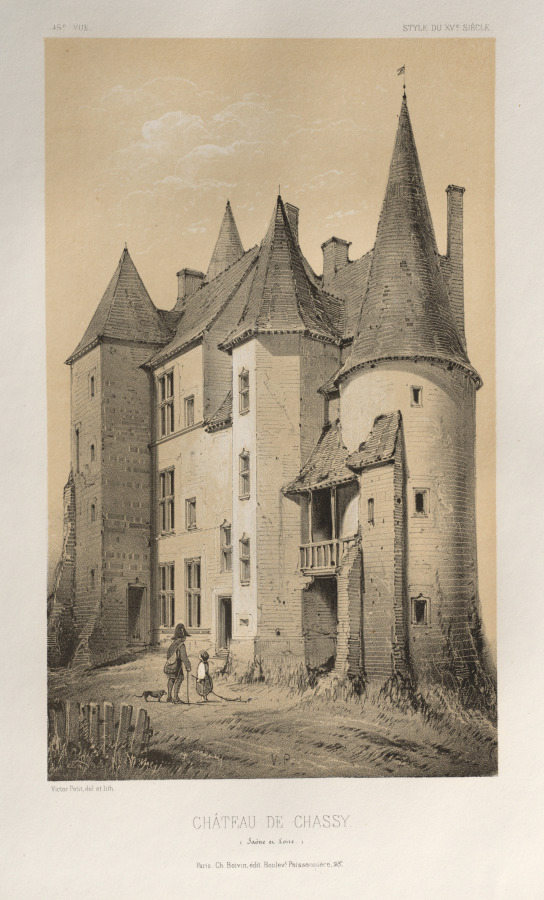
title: Architecture Pittoresque ou Monuments des xveme. Et xvieme. Siecles: Chateaux De France des XV et XVI Siecles: Pl. 45 Château De Chassy (Saône et Loire)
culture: France, 19th century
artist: Victor Petit (French, 1817–1874)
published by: Charles Boivin (publisher and editor); Lith de Godard a Paris (printer)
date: 1860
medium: lithograph with tint stone, from portfolio of 100 lithographs with tint stone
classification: Print